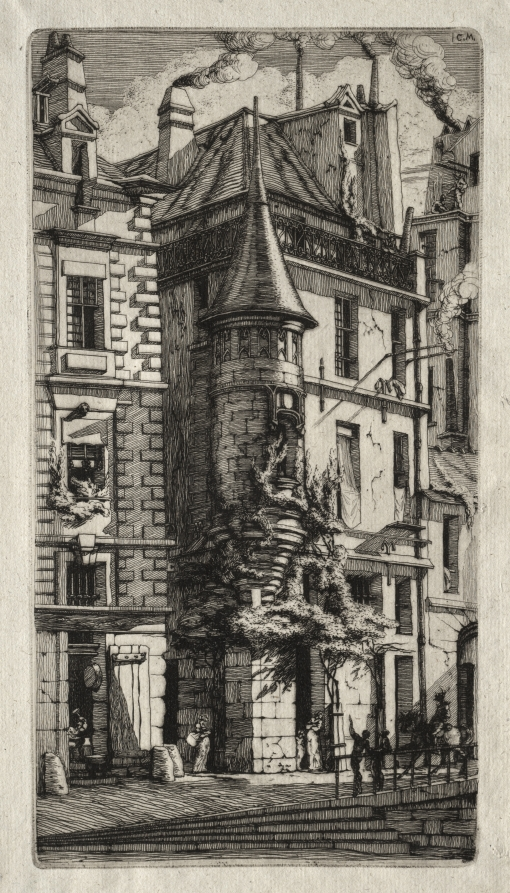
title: Etchings of Paris: House with a Turret, Weavers' Street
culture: France, 19th century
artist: Charles Meryon (French, 1821–1868)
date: 1852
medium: etching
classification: Print